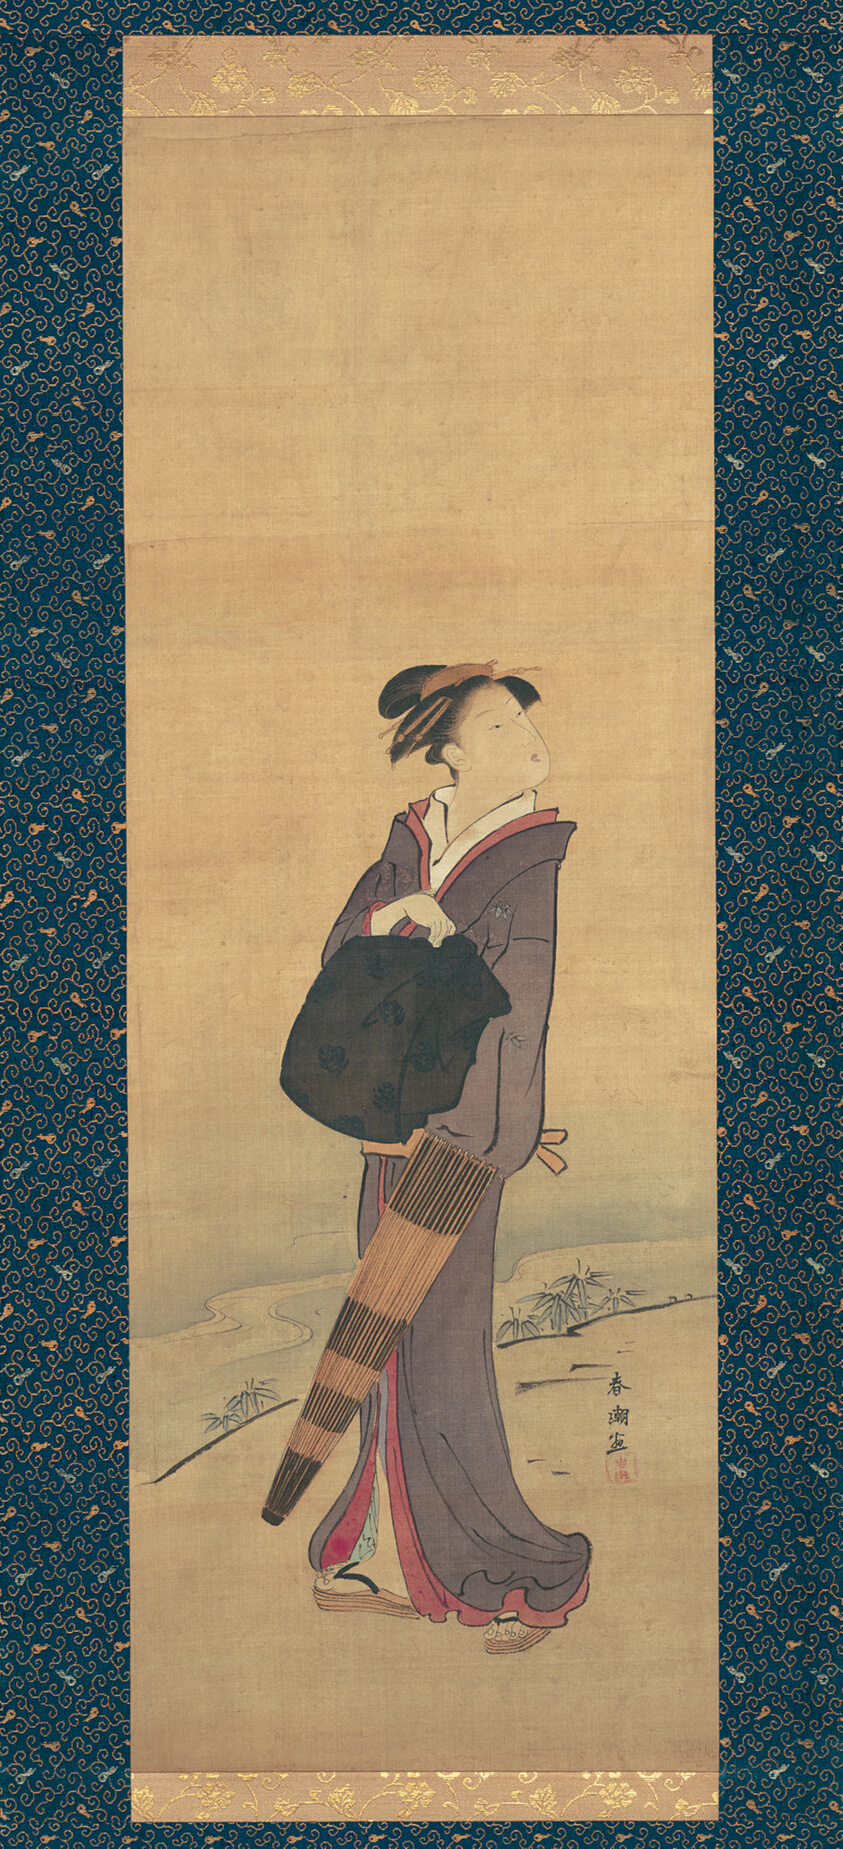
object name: Painting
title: Girl on River Bank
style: Japanese (culture or style)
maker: Katsukawa Shunchô (Japanese, 1726-1792)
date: c. 1780/95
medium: Hanging scroll; Ink and colors on silk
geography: Ueno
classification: hanging scroll; painting; asian art